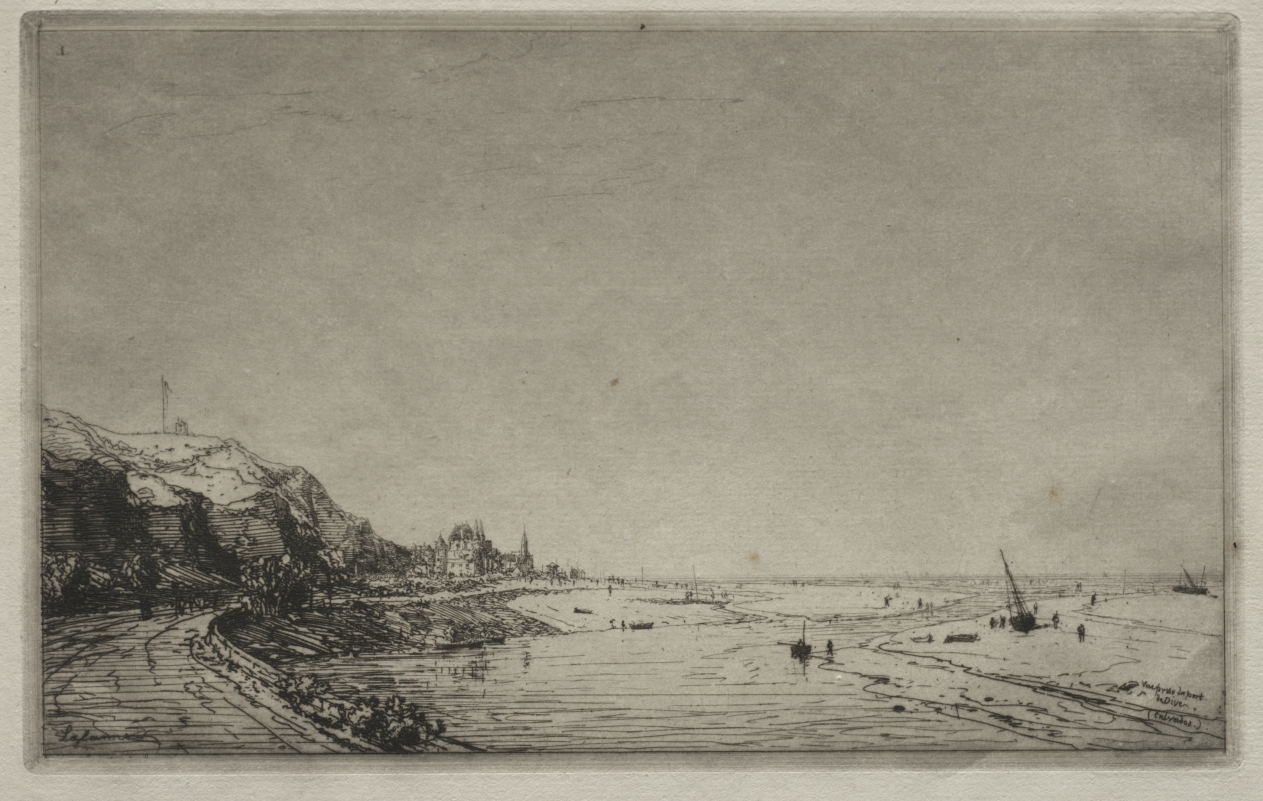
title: View from Port du Dives (Calvados)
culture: France, 19th century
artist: Maxime Lalanne (French, 1827–1886)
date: 1869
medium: etching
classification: Print